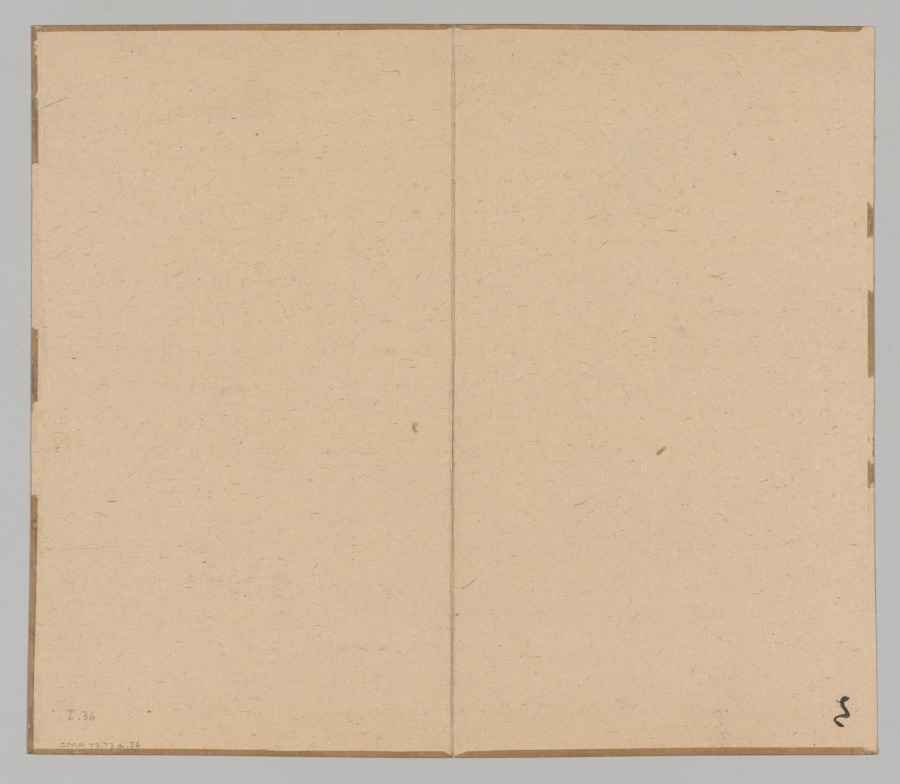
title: Reverberations of Taiga, Volume 1 (leaf 36)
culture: Japan, Edo period (1615–1868)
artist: Aoki Shukuya (Japanese, d. 1802)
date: mid- to late 1700s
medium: double-leaf from a pair of albums; ink and light color on paper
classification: Portfolio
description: Traditionally, young painters in Japan began their studies with an established master-painter. The master's compositions invariably became models that the apprentice copied to learn various ink and brush techniques. Shukuya was a pupil of the famous Kyoto artist Ikeno Taiga, whose style is reflected in these sketches of rocks, trees, and mountains.